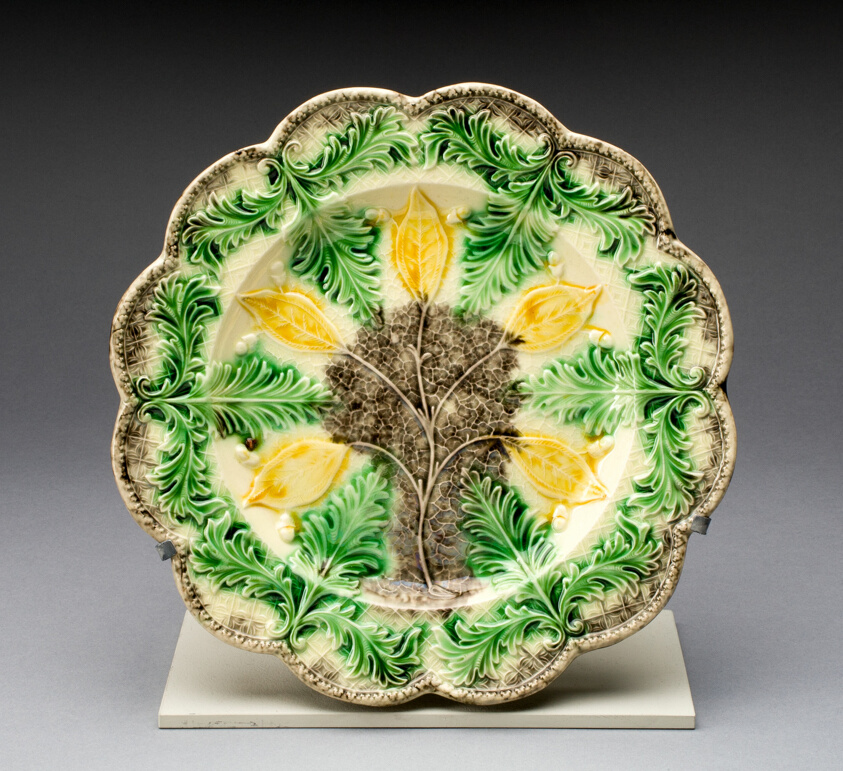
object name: Ceramics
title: Plate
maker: Staffordshire, England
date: 1760/70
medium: Lead-glazed earthenware (creamware)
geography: Staffordshire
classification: plate (general, dish); dish (vessel); ceramics; creamware; earthenware; european decorative arts; lead-glazed earthenware